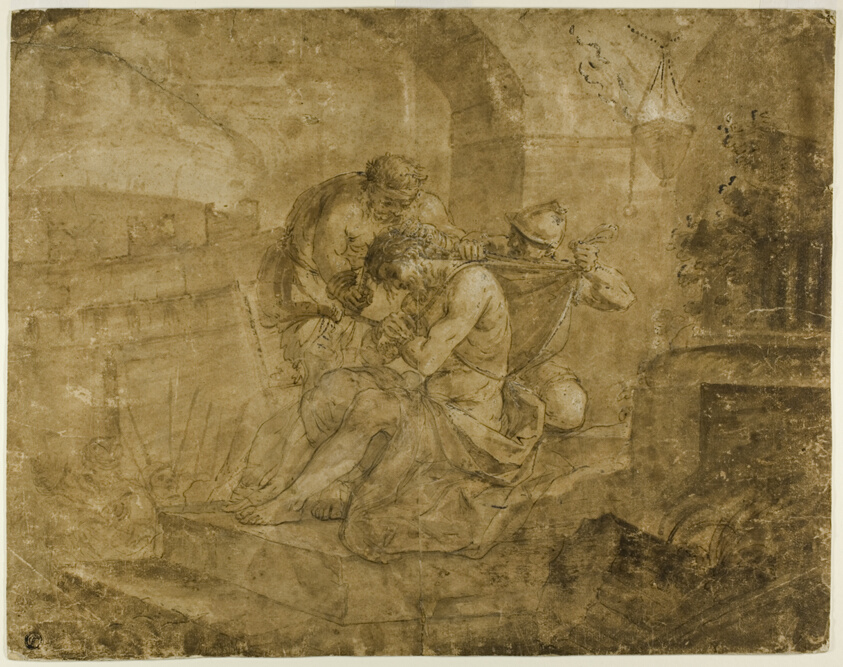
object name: Drawing and Watercolor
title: Christ Stripped of His Garments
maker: Lorenzo Garbieri (Italian, 1580-1654)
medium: Pen and brown ink, with brush and brown wash, with black chalk, heightened with lead white (partly discolored), on tan laid paper, laid down on gray wove paper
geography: Italy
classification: ink or chalk wash; drawings (visual works); prints and drawing